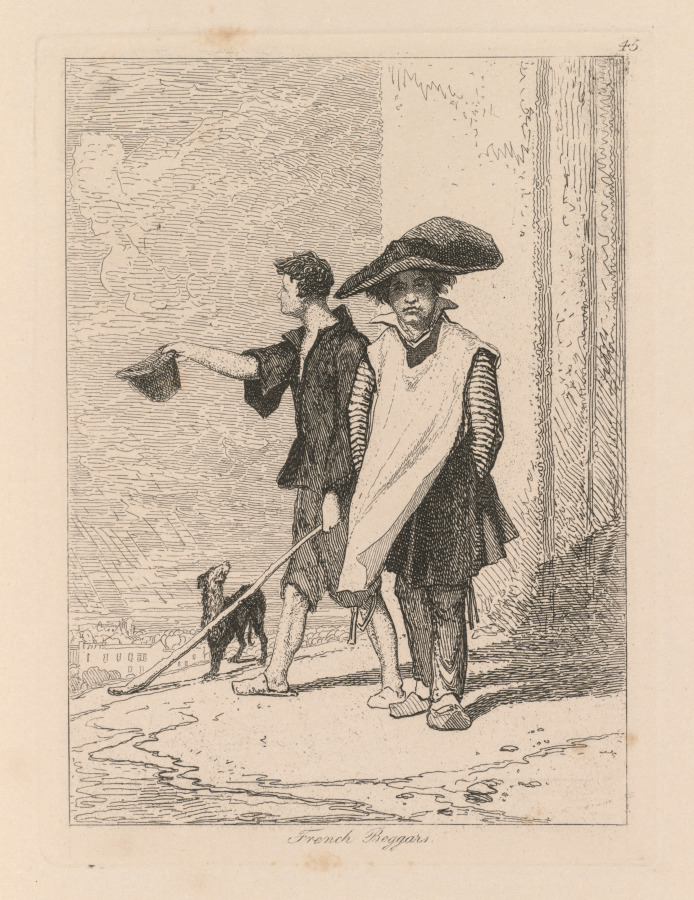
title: Liber Studiorum: Plate 45, French Beggars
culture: England, 19th century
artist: John Sell Cotman (British, 1782–1842)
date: 1838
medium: softground etching, from a bound volume containing 48 plates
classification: Bound Volume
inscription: In plate, within image, upper right: 45; in plate, below image: French Beggars